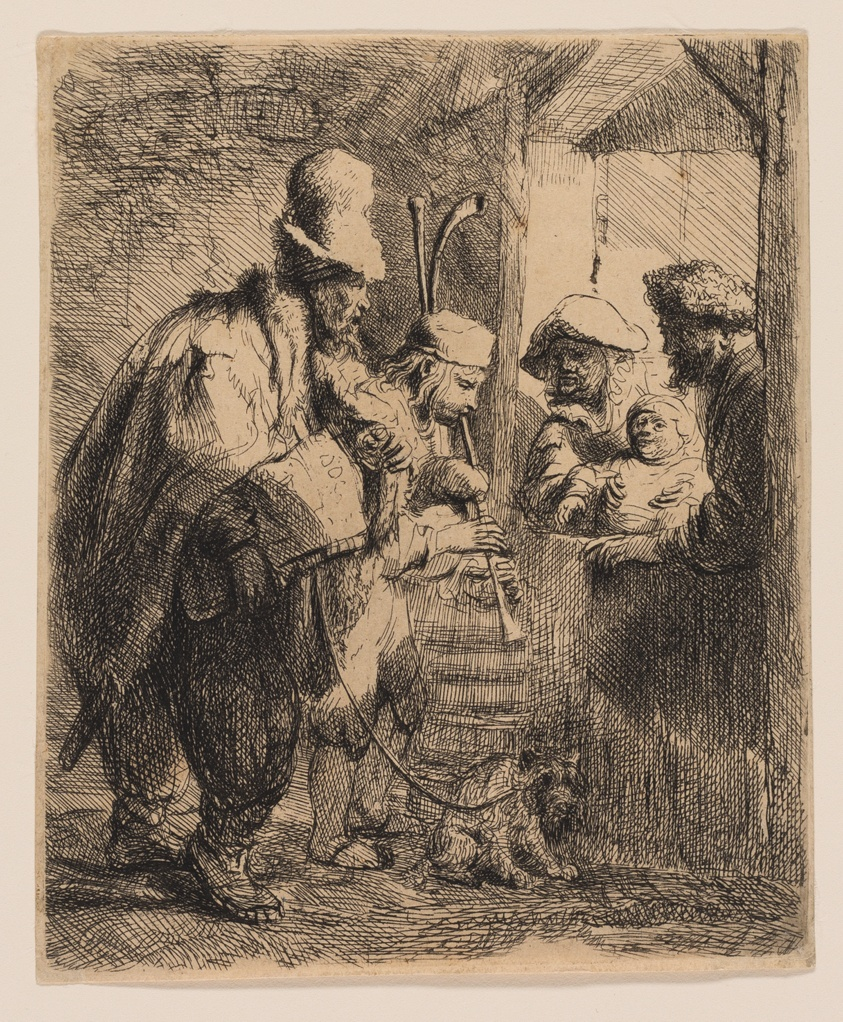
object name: Print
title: The Strolling Musicians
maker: Rembrandt van Rijn (Dutch, 1606-1669)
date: c. 1635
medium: Etching in black on tan laid paper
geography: Holland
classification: etching; print; prints and drawing; paper